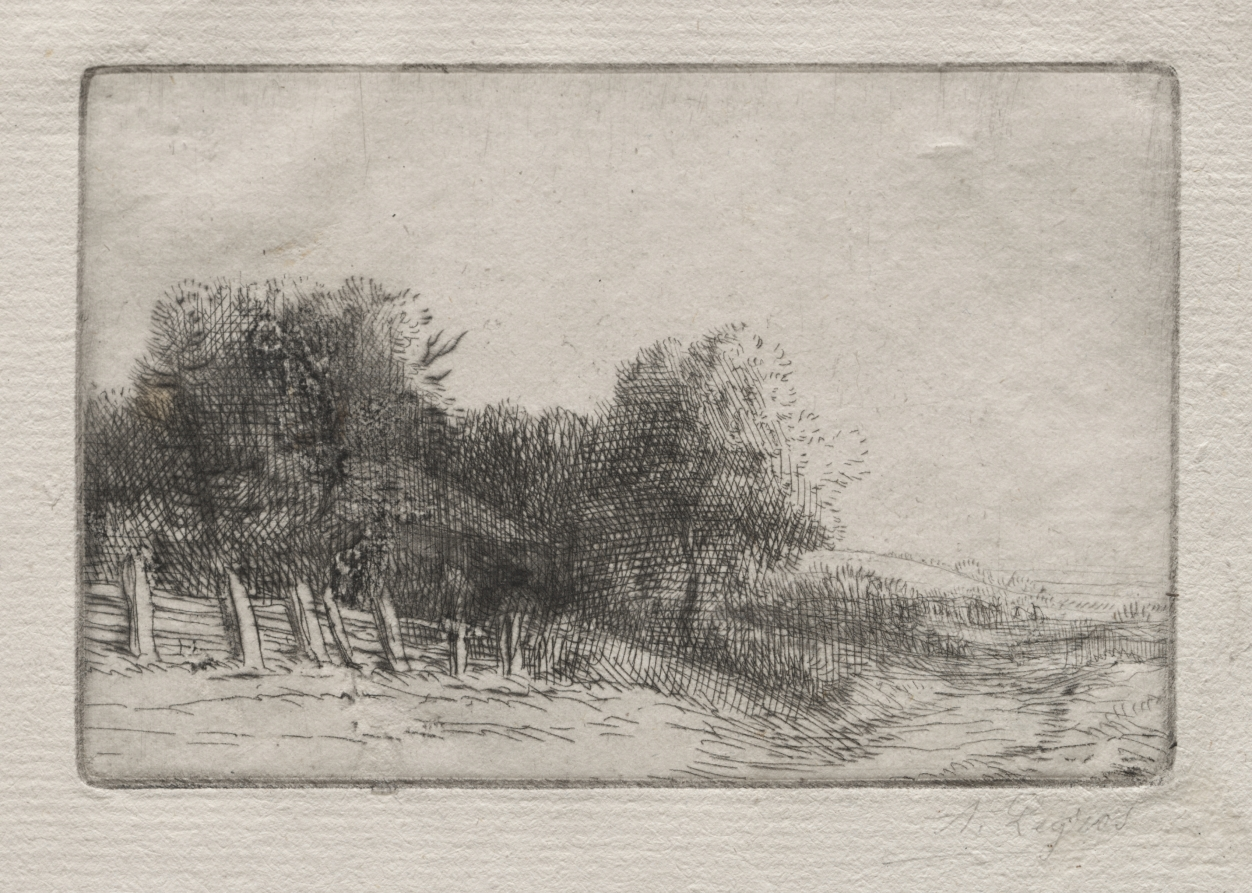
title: Landscape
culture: France, 19th-20th century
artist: Alphonse Legros (French, 1837–1911)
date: c. 1857–1911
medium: etching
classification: Print